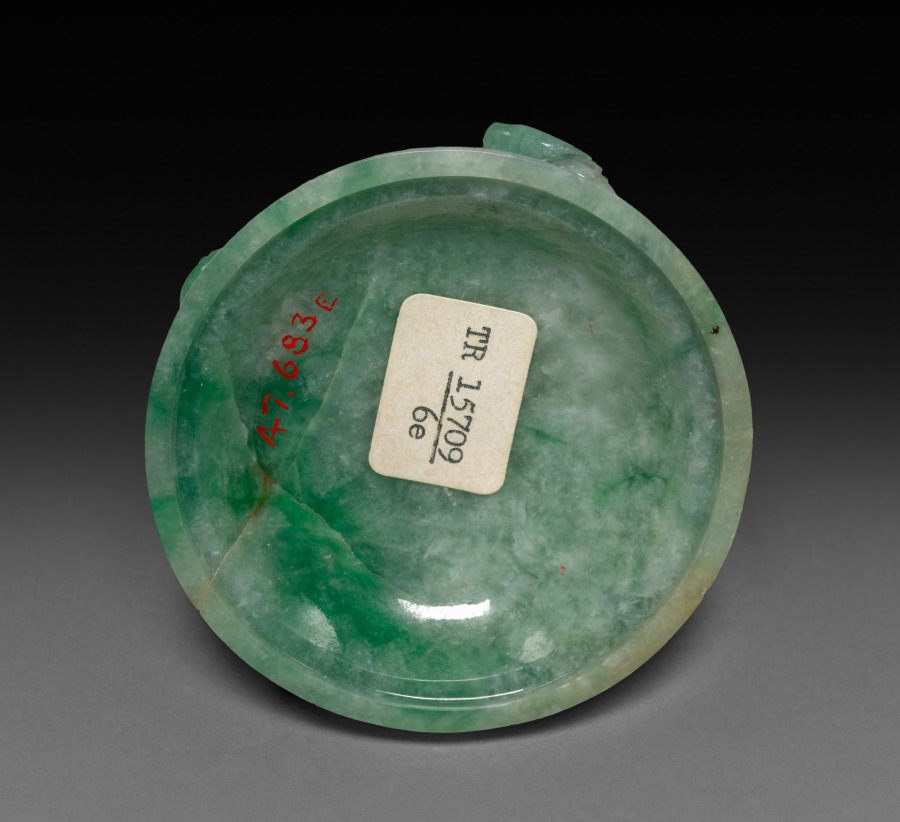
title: Three-Sectional Altar Group: Small Bowl with Carved Dragon (lid)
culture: China, Qing dynasty (1644-1911)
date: 1644–1911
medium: jade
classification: Jade